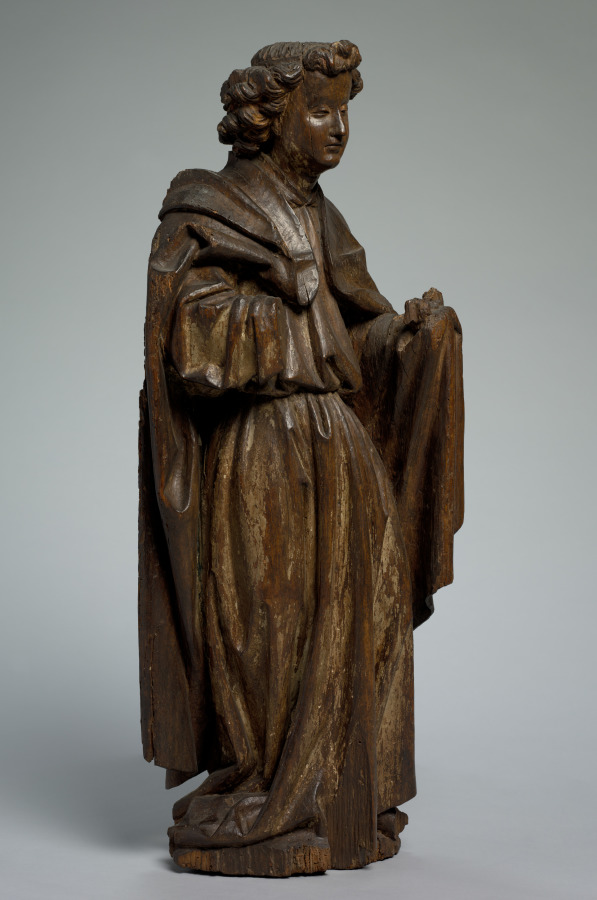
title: Angel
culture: Bruges?, Belgium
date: c. 1430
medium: oak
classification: Sculpture